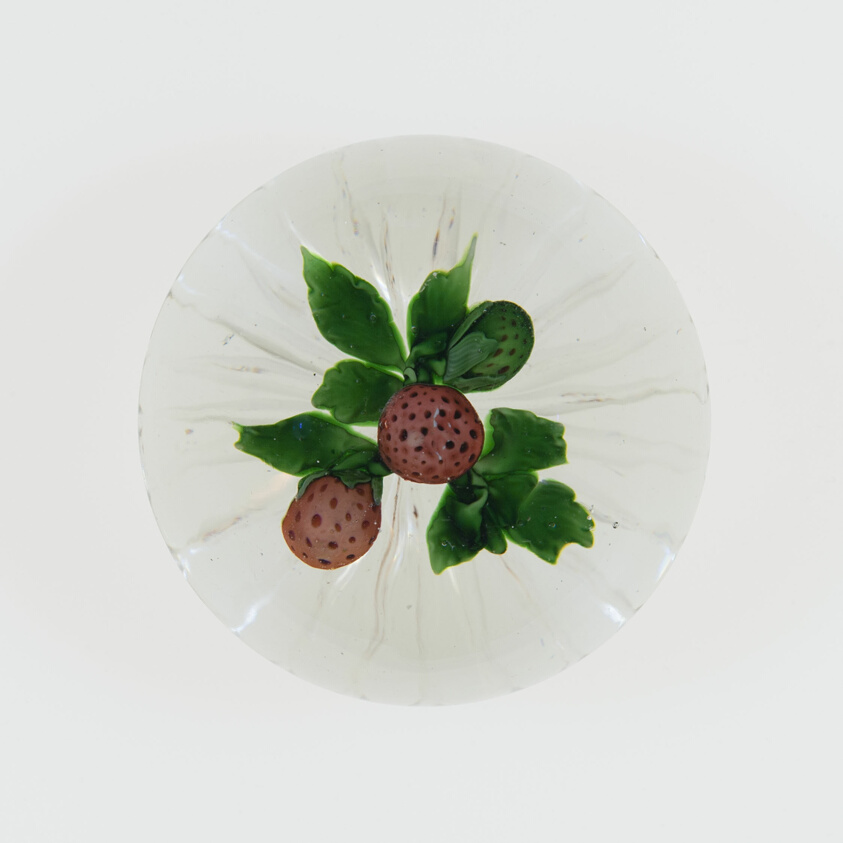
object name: Glass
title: Paperweight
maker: Baccarat Glassworks (Cristalleries de Baccarat); Lorraine, France, founded 1764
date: c. 1848–55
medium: Glass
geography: Lunéville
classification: paperweight; lampwork; european decorative arts; glass